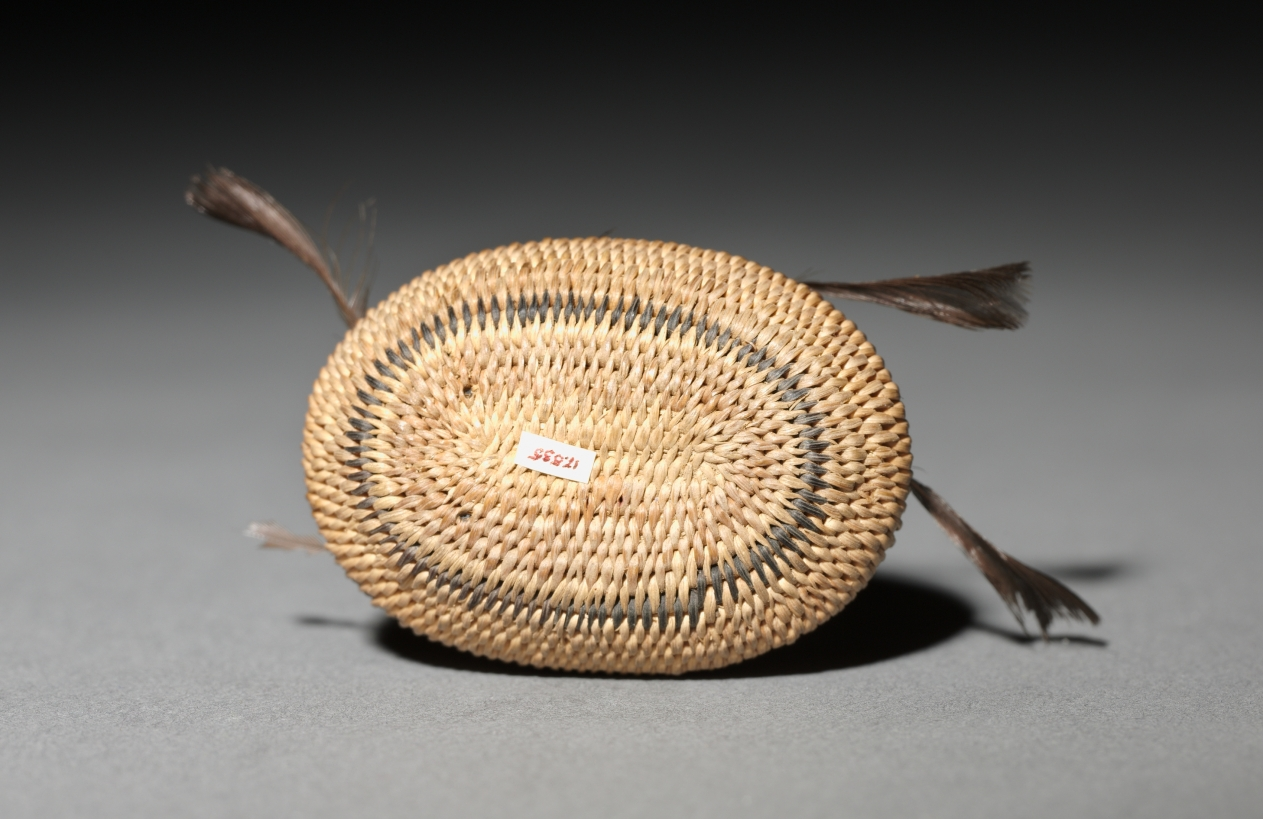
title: Miniature Rhomboidal Basket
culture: California, Pomo, 20th century (?)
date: Early 1900s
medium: coiled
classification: Basketry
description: Miniature baskets were made to demonstrate the basket-maker’s virtuoso skill, and these tiny marvels seem to be no exception—the smallest are just a few millimeters wide but still patterned. For such fine work, dexterity was required as much for preparation of materials as for weaving.